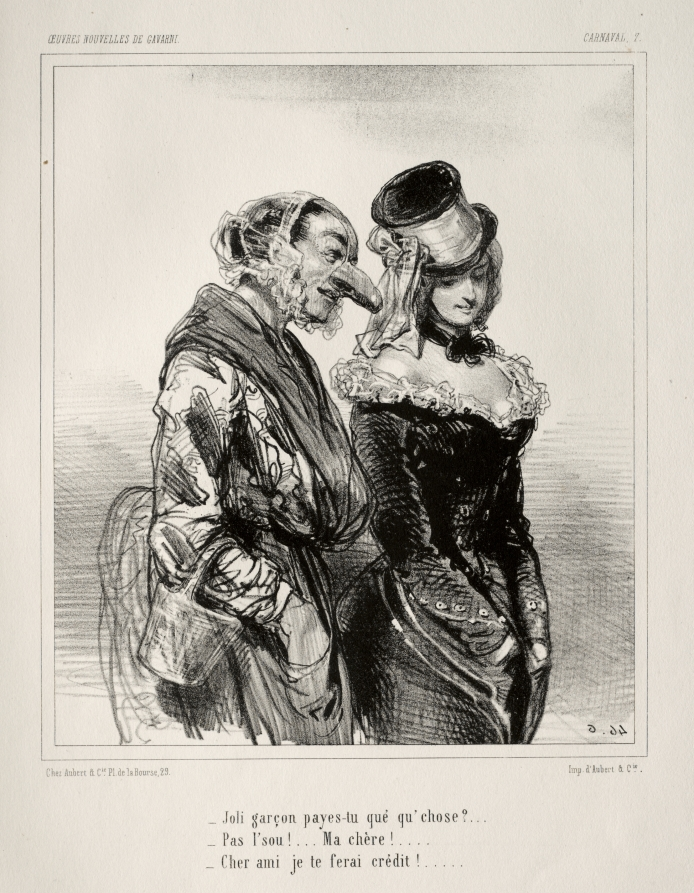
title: Carnaval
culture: France, 19th century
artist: Paul Gavarni (French, 1804–1866)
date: c. 1841–47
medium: lithograph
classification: Print